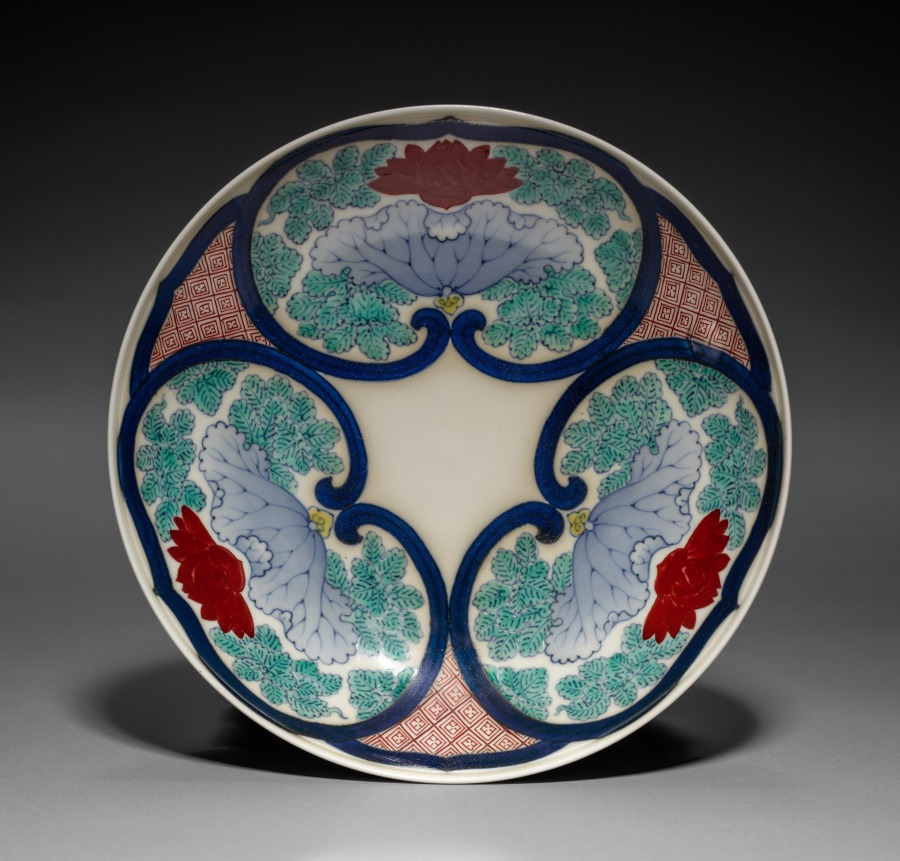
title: Dish with Lotus in Rui-Head-Shaped Cartouches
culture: Japan, Edo period (1615–1868)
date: mid-1800s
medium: Porcelain with underglaze blue and overglaze enamel (Hizen ware, Nabeshima type)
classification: Ceramic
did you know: A ruyi is a curved decorative object with a head like a cloud or lingzhi mushroom.